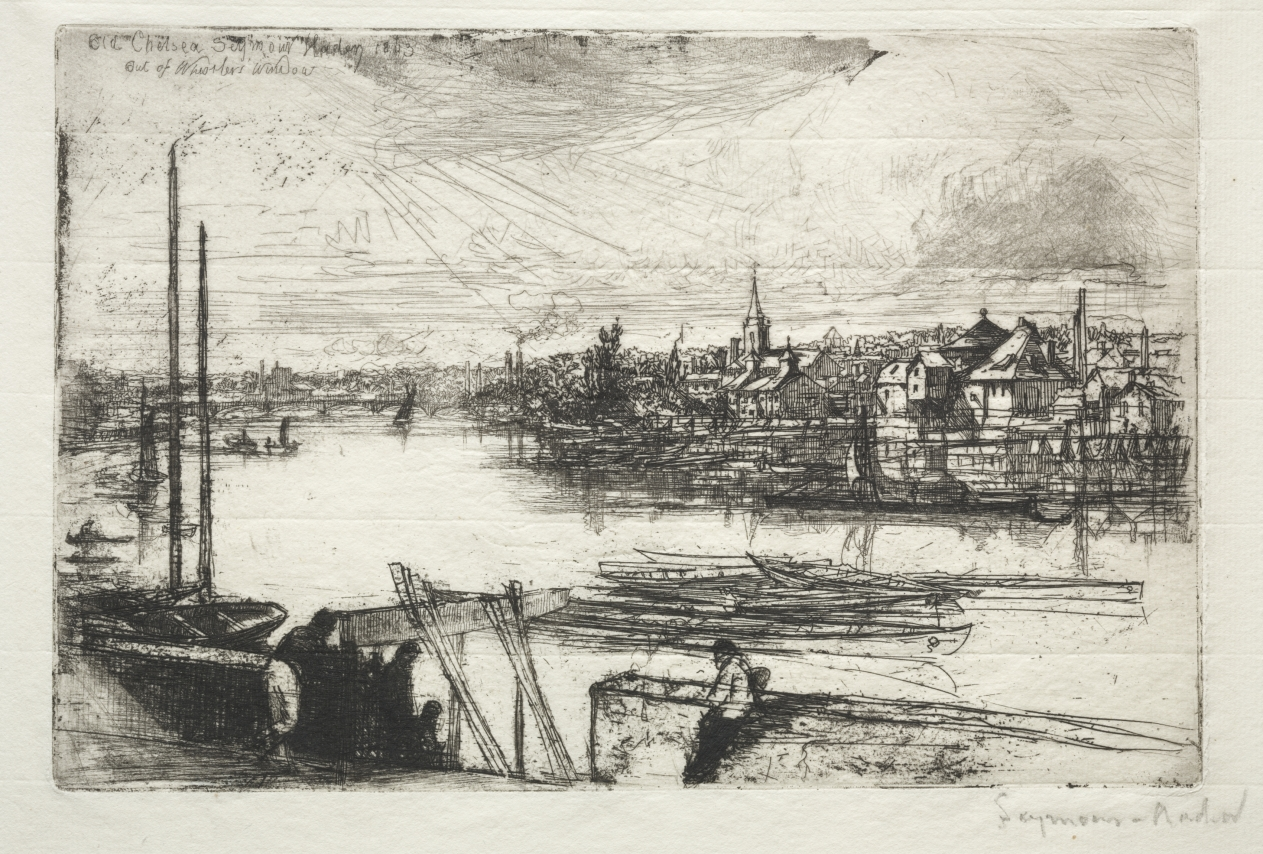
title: Battersea Reach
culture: England, 19th century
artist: Francis Seymour Haden (British, 1818–1910)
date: 1843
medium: etching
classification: Print